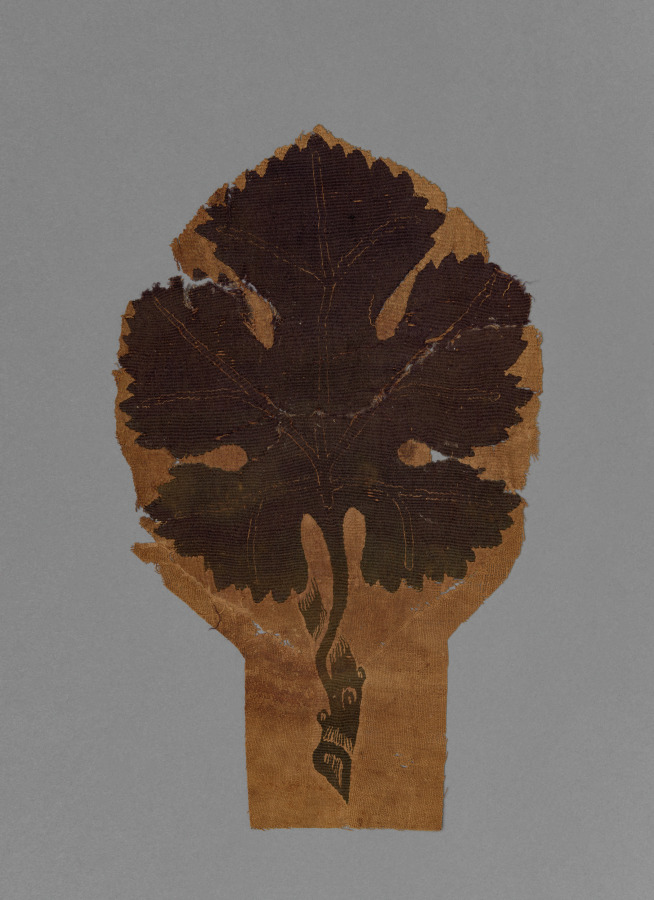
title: Grape Leaf from a Curtain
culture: Egypt, Byzantine period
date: 400s-500s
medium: weft-faced plain weave with tapestry weave and supplementary weft wrapping; undyed linen and dyed wool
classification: Textile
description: This deep-purple grape leaf once decorated the plain linen ground of a curtain. It probably refers to Dionysus, the classical god of wine, whose cult was popular in Egypt through the 6th century.